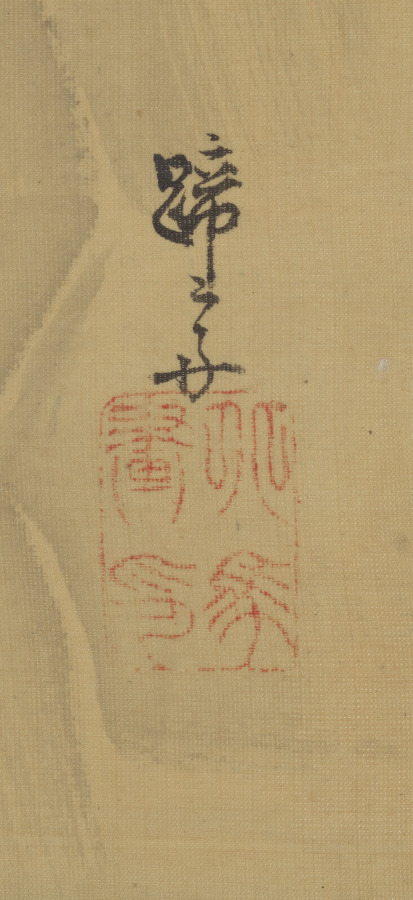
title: Pleasure Boat on the Sumida River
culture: Japan, Edo period (1615–1868)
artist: Teisai Hokuba (Japanese, 1771–1844)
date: 1800s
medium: Hanging scroll; ink and color on silk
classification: Painting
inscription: Signed: Teisai. Sealed: Teisai go [no] in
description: After a major fire in Edo (now Tokyo), the Yoshiwara licensed brothel district was relocated to an area accessed via boat along the Sumida River, giving rise to many compositions depicting travel there. Here, attendants with checkered robes serve refreshment to a client. A figure at the fore of the boat tends to the kitchen. A courtesan at the aft, or rear, surveys the river scene. Acquaintances converse in modest commuter boats, and fishers put in to a tiny island. The boat is near the entrance to the San’ya Canal, where pleasure-seekers would disembark.